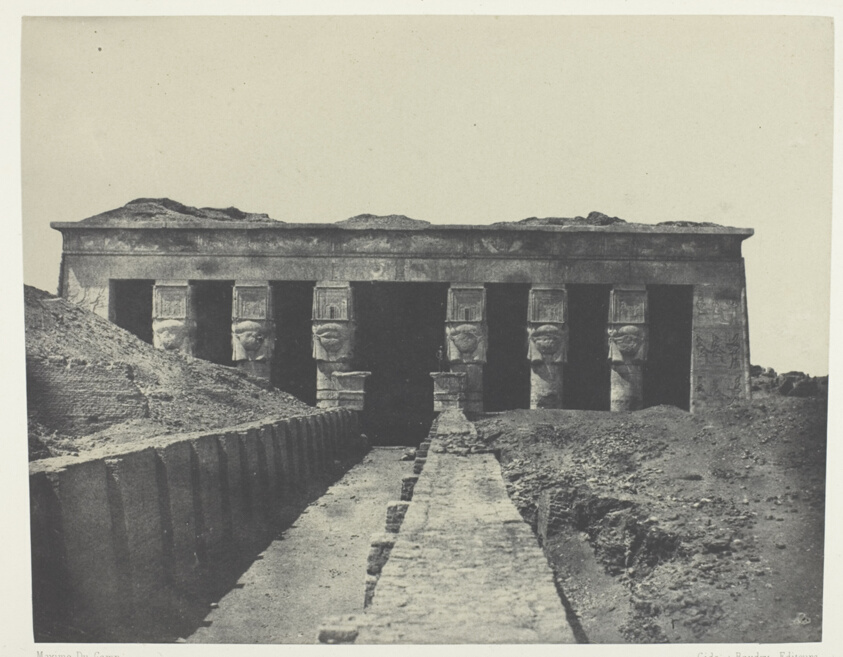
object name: Photograph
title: Vue Générale, Grand Temple de Dendérah (Teutyres), Haute-Egypte, plate 16 from the album "Egypte, Nubie, Palestine et Syrie" (1852)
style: 19th century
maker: Maxime Du Camp (French, 1822–1894)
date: 1849/51, printed 1852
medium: Salted paper print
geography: France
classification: salted paper print; photographic process; photography; photograph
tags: Collected by Hugh Edwards, Egypte, Nubie, Palestine et Syrie